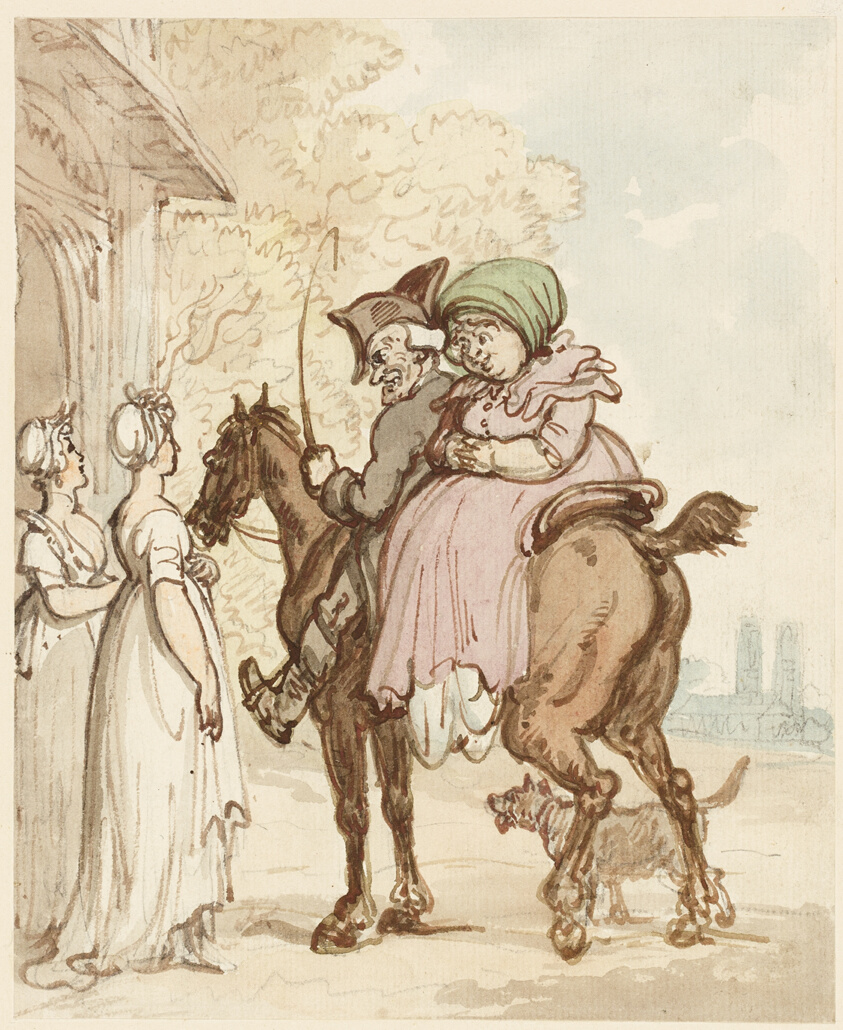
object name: Drawing and Watercolor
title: Vicar of Wakefield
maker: Thomas Rowlandson (English, 1756-1827)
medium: Brush and brown ink and watercolor, over graphite, on ivory laid paper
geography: England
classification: watercolor; drawings (visual works); prints and drawing